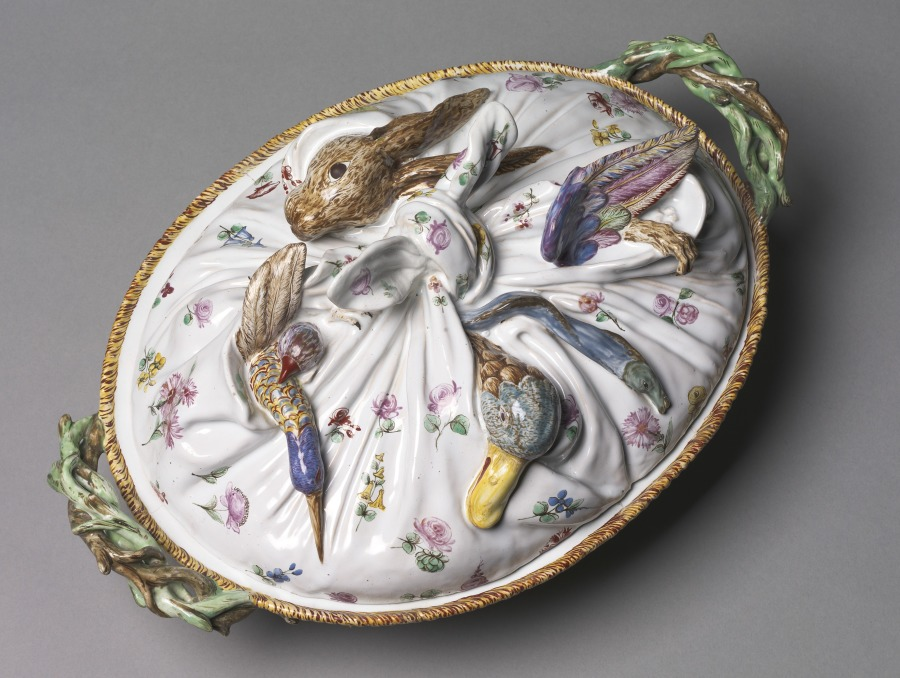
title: Covered Tureen in the Form of a Basket of Game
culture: France, 18th century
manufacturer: Sceaux Factory (French, active 1748–66)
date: c. 1755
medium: Tin- glazed earthenware (faience) wth enamel decoration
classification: Ceramic